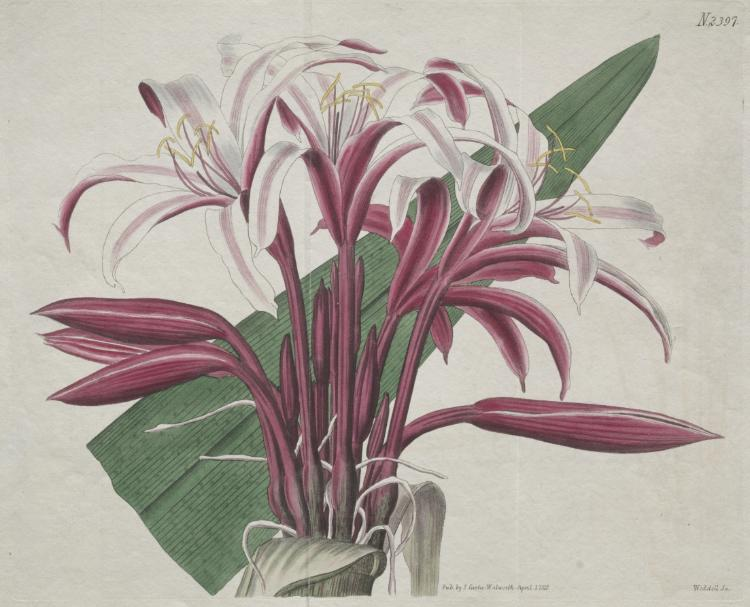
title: The Botanical Magazine or Flower Garden Displayed: Stately Crinum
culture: England, 19th century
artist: S. Curtis (British)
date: 1823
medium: engraving, hand-colored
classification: Print